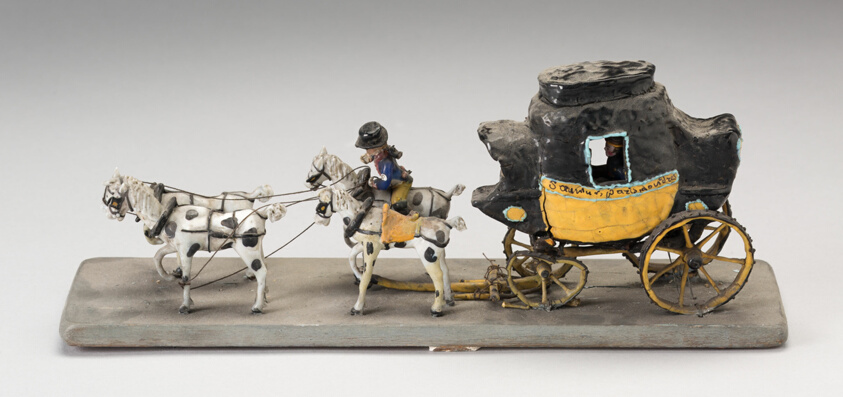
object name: Glass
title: Saumur Coach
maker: Nevers, France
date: c. 1850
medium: Glass; lampwork (verre de Nevers), metal armature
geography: France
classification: glass; miniature; decorative object/ornament; european decorative arts